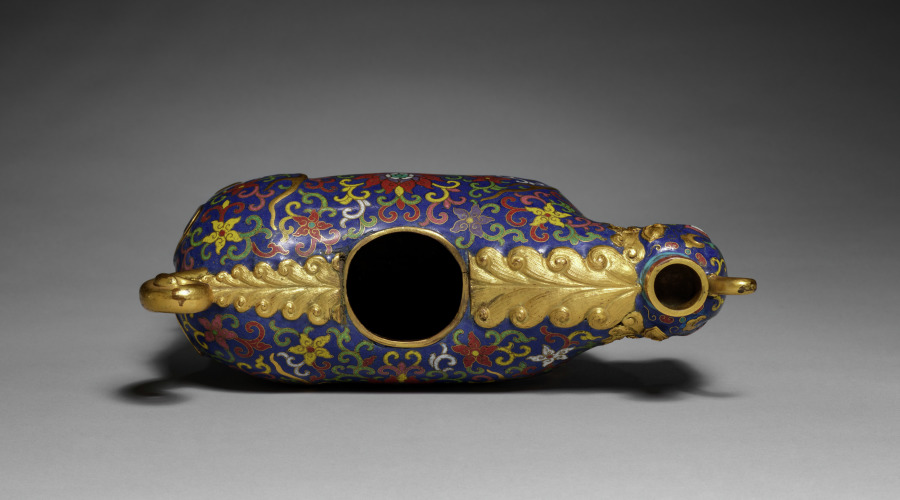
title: Container in the Form of a Unicorn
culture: China, Qing dynasty (1644-1911), Qianlong mark and reign (1736-95)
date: 1736–95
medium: cloisonné enamel and gilt copper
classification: Enamel